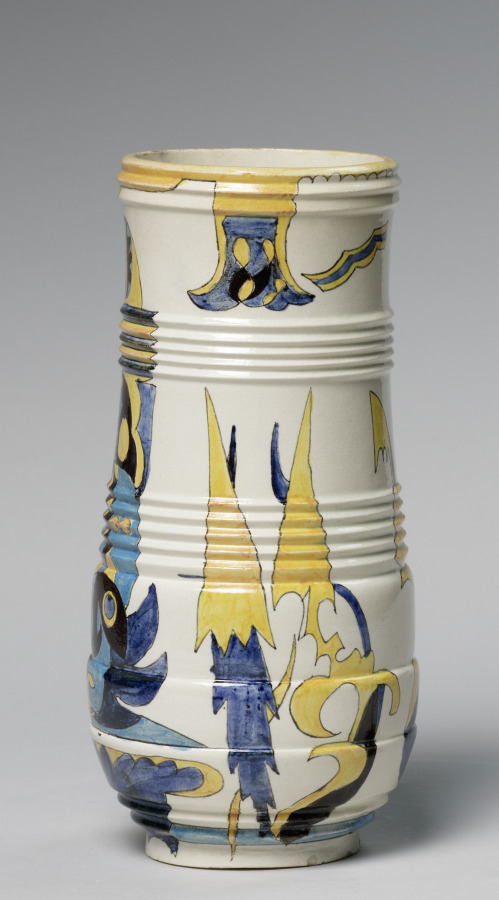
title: Jar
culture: Netherlands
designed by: Theodorus A. C. Colenbrander (Dutch, 1841–1930)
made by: Rozenburg Factory (Netherlandish)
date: 1885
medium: earthenware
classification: Ceramic